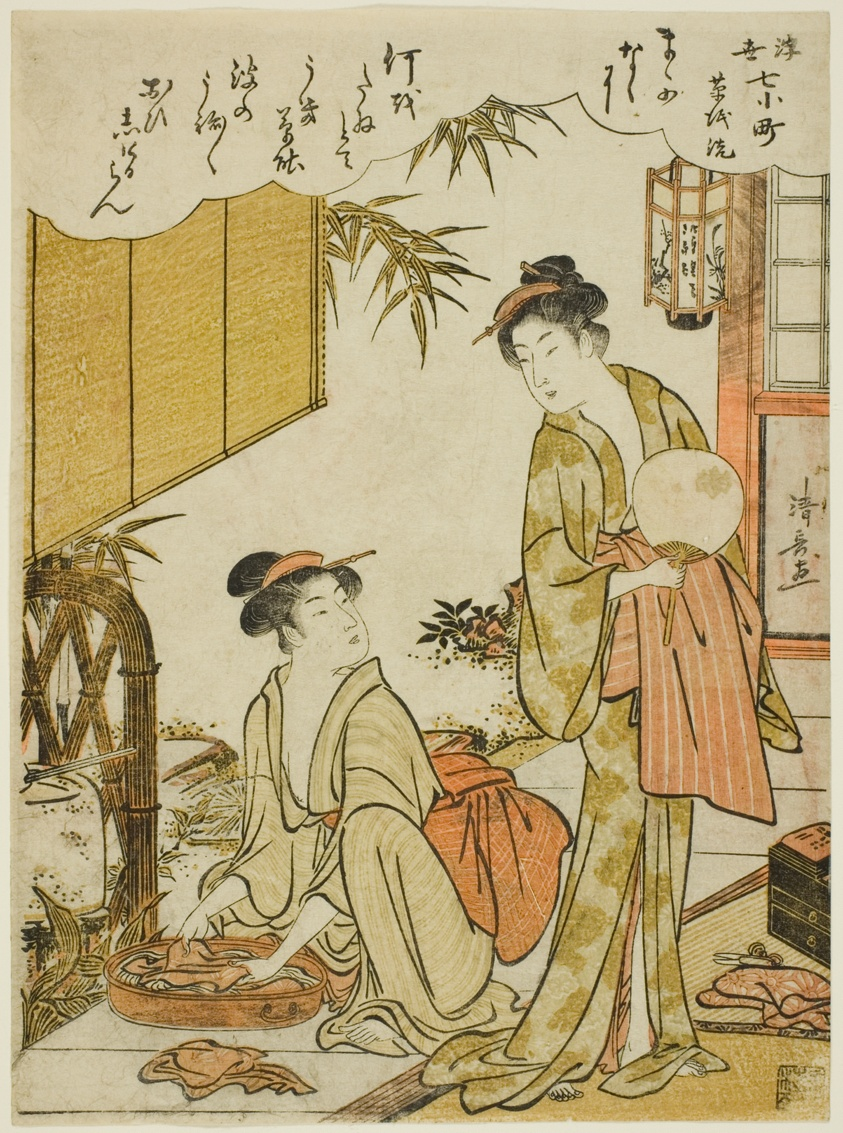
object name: Print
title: Ono no Komachi Washing the Copybook (Soshiarai Komachi), from the series The Seven Ukiyo-e Aspects of Komachi (Ukiyo-e nana Komachi)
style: Japanese (culture or style)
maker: Torii Kiyonaga (Japanese, 1752-1815)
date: Edo period (1615–1868), about 1779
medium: Color woodblock print; chuban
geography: Japan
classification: woodblock print; print; asian art